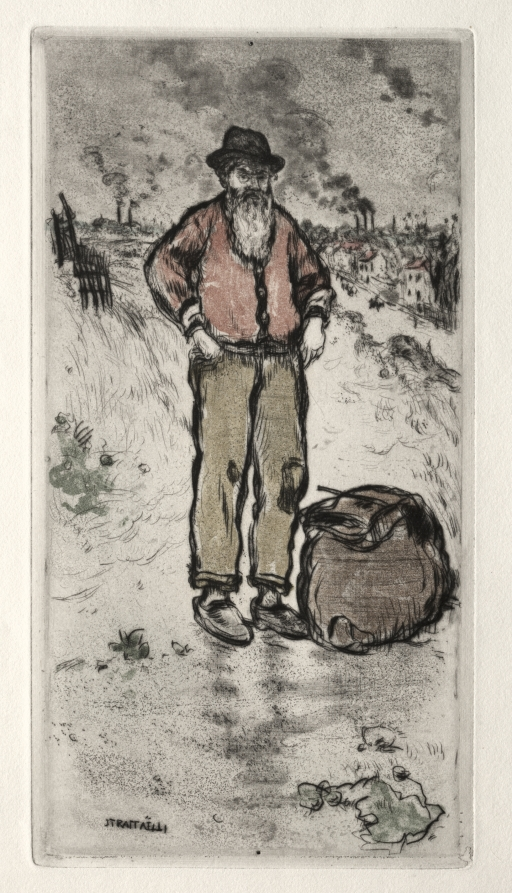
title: The Rag Picker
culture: France, 20th century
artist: Jean-François Raffaëlli (French, 1850–1924)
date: 1911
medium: etching, drypoint and aquatint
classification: Print